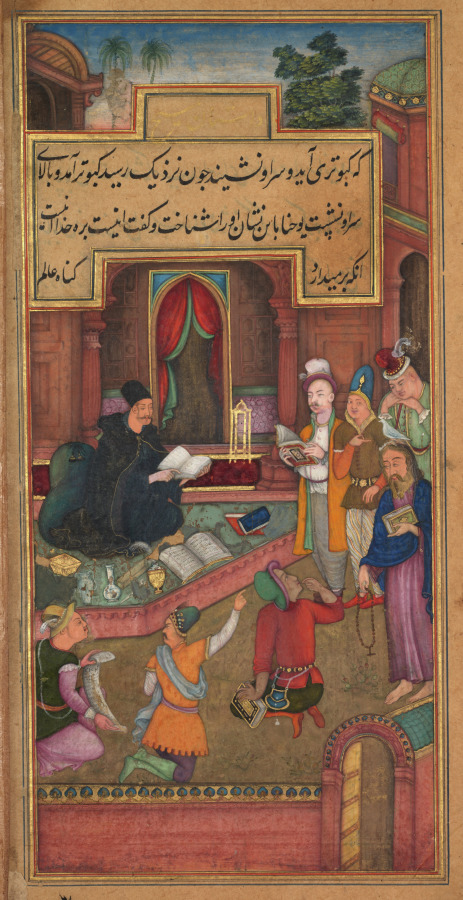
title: John the Baptist recognizes Christ by the appearance of a dove (folio 50 verso), from a Mirror of Holiness (Mir’at al-quds) of Father Jerome Xavier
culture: Mughal India, Allahabad, made for Prince Salim (1569–1627)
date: 1602–4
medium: Gum tempera, ink, and gold on paper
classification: Manuscript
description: Wearing the black robes and cap of a Jesuit priest, John the Baptist sits in a well-appointed Mughal-style courtyard. According to Father Jerome’s text, John recognizes Jesus by the dove who sits on his head. Possibly Father Jerome intended to relate the Gospel account that describes the dove of the Holy Spirit as hovering in the air above his head. The artist’s own reactions to this passage may be reflected in the expressions and gestures of the onlookers, who seem incredulous and bemused at this sign.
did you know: Jesus holds a rosary with a cross even in scenes prior to his crucifixion.